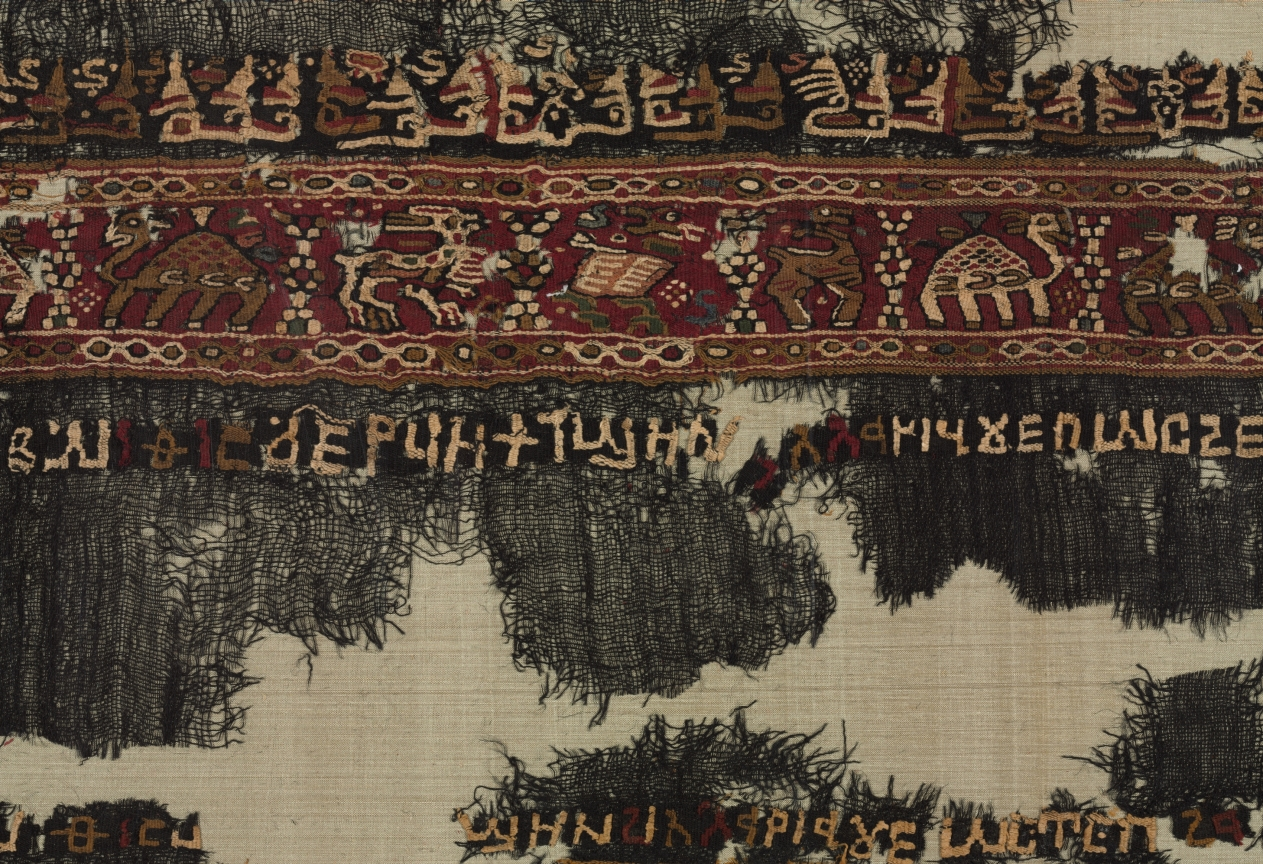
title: Decorated ends of a shawl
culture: Egypt, Fayyum, Tulunid or Ikshīdid period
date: 770–887 (radiocarbon date, 95.4% probability)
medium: Wool, linen, and silk: plain weave with inwoven tapestry weave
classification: Textile